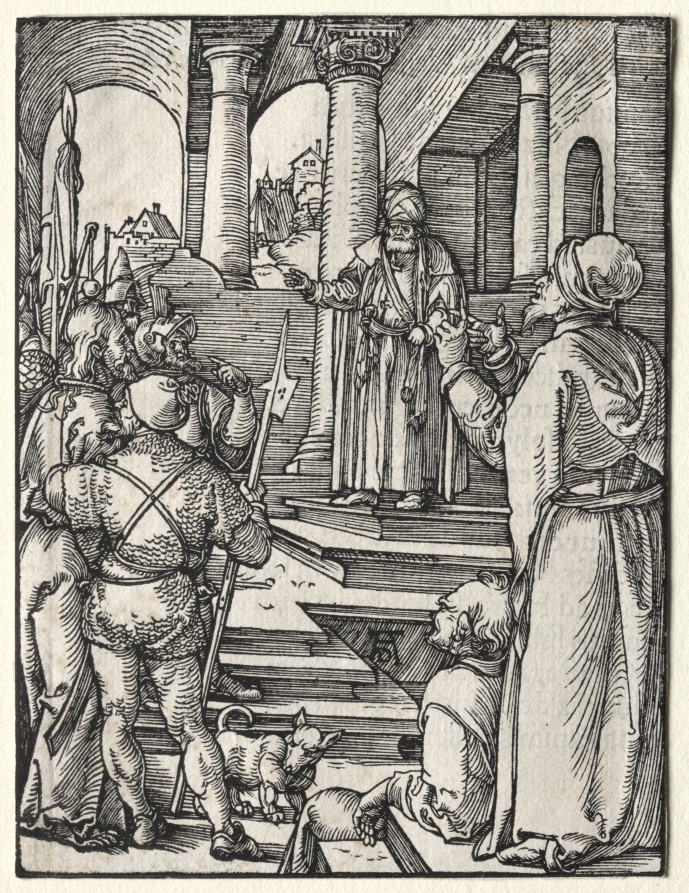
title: The Small Passion: Christ Before Pilate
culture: Germany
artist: Albrecht Dürer (German, 1471–1528)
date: c. 1509–1511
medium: woodcut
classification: Print